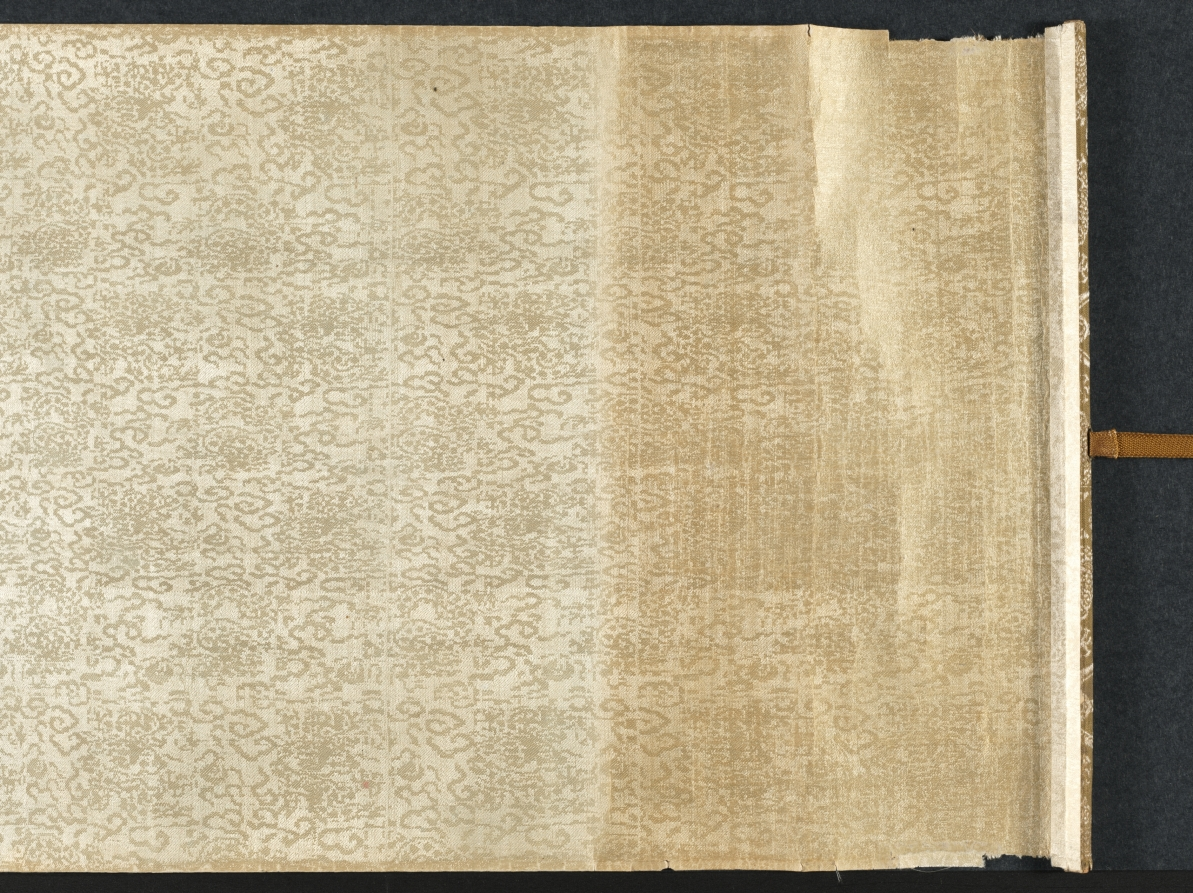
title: Landscape with Bamboo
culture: China, Yuan dynasty (1271-1368)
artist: Song Ke (Chinese, 1327–1387)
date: 1300s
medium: Handscroll; ink on paper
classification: Painting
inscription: 東吳宋克戲為仲幾畏友圖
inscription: 2 colophons and 14 additional seals: 1 seal of Yü Chung-chi (14th c.); 1 seal of Wu Ch'eng (1469 jinshi); 1 colophon and 2 seals of Wu K'uan (1435–1504); 1 colophon and 9 seals of Cheng Qi (1911–1988); 1 seal unidentified.